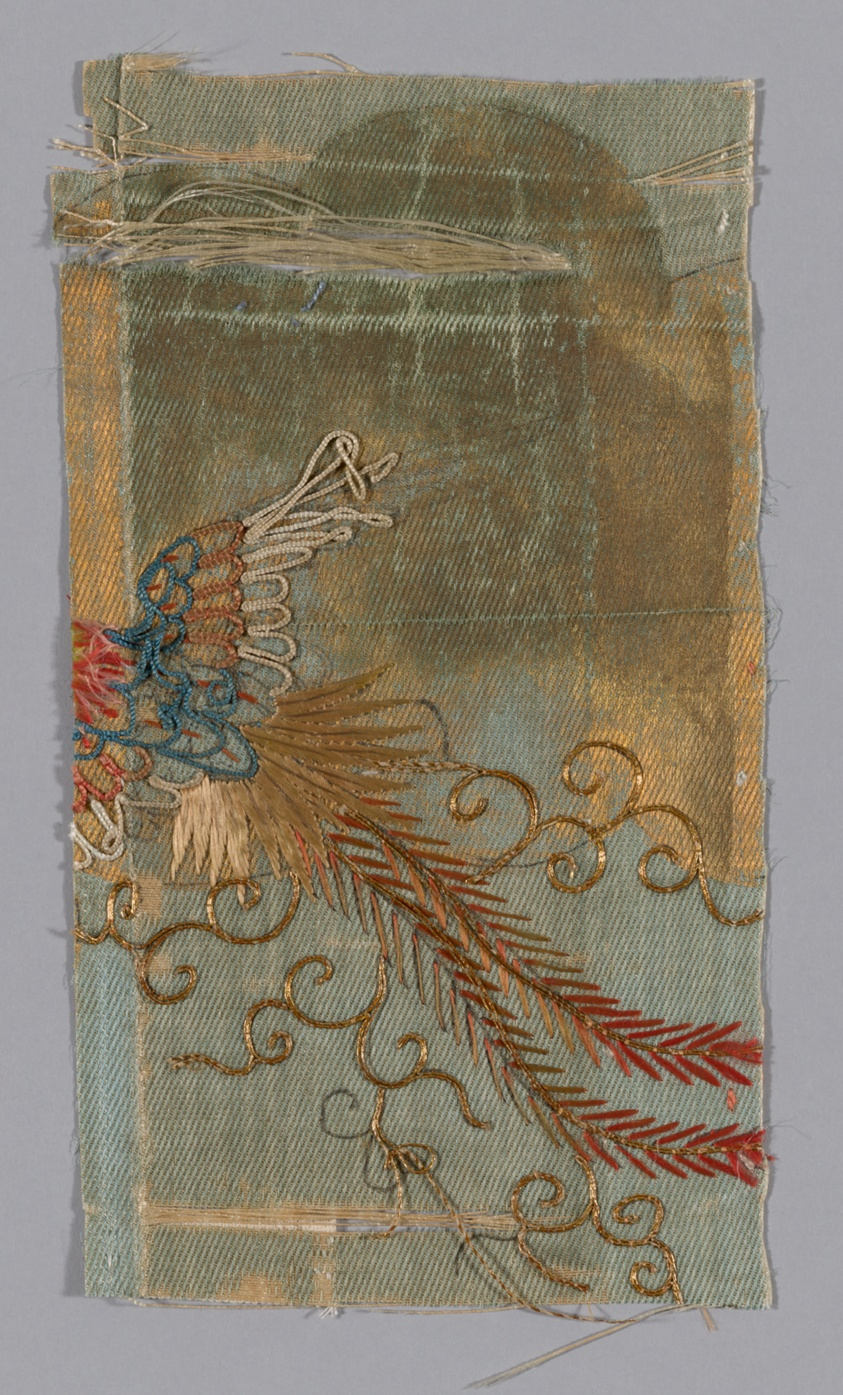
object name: Textile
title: Fragment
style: Chinese (culture or style)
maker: China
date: 17th century, Qing dynasty (1644–1911)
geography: China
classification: textile; weaving